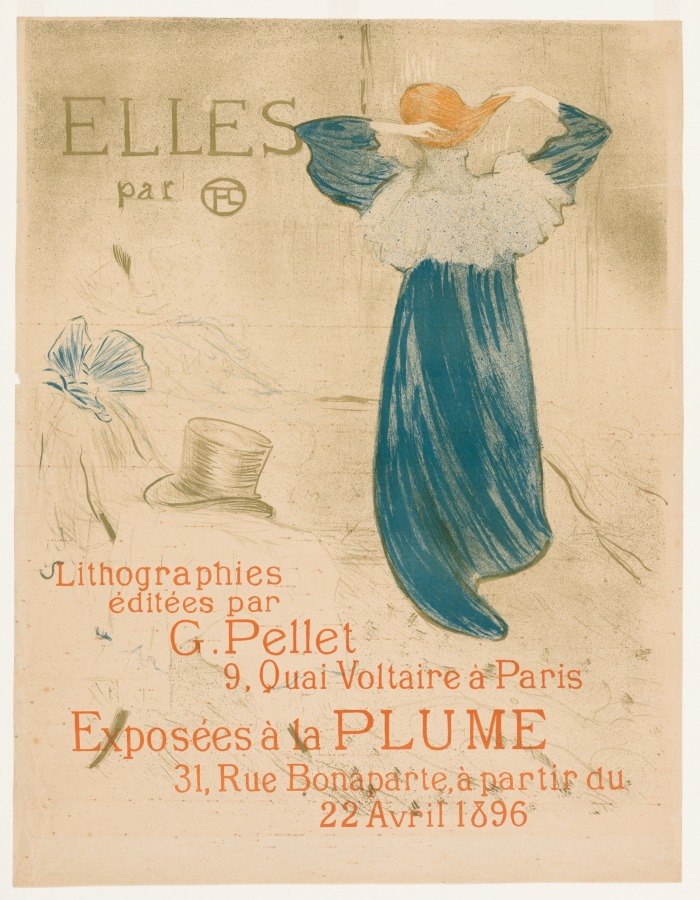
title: Elles: Frontispiece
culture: France, 19th century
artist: Henri de Toulouse-Lautrec (French, 1864–1901)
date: 1896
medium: lithograph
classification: Print